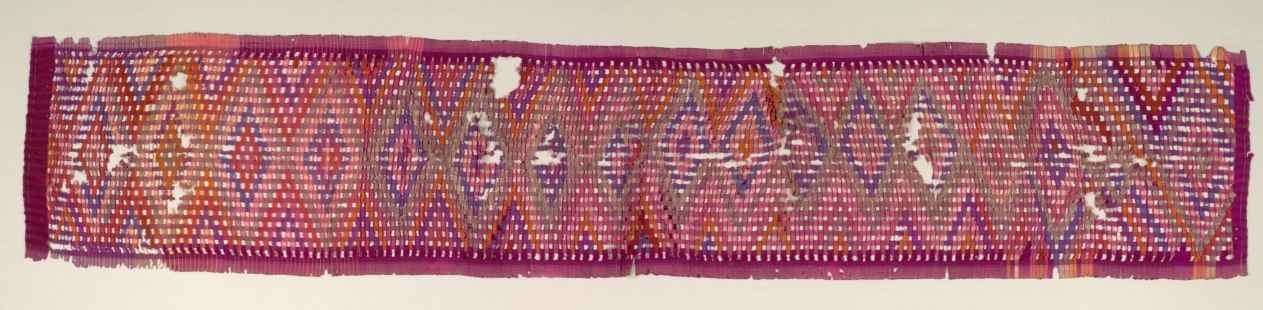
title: Textile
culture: Indonesia, Bali, 20th century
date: 1900s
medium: tabby weave with discontinuous wefts and weft floats; cotton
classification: Textile